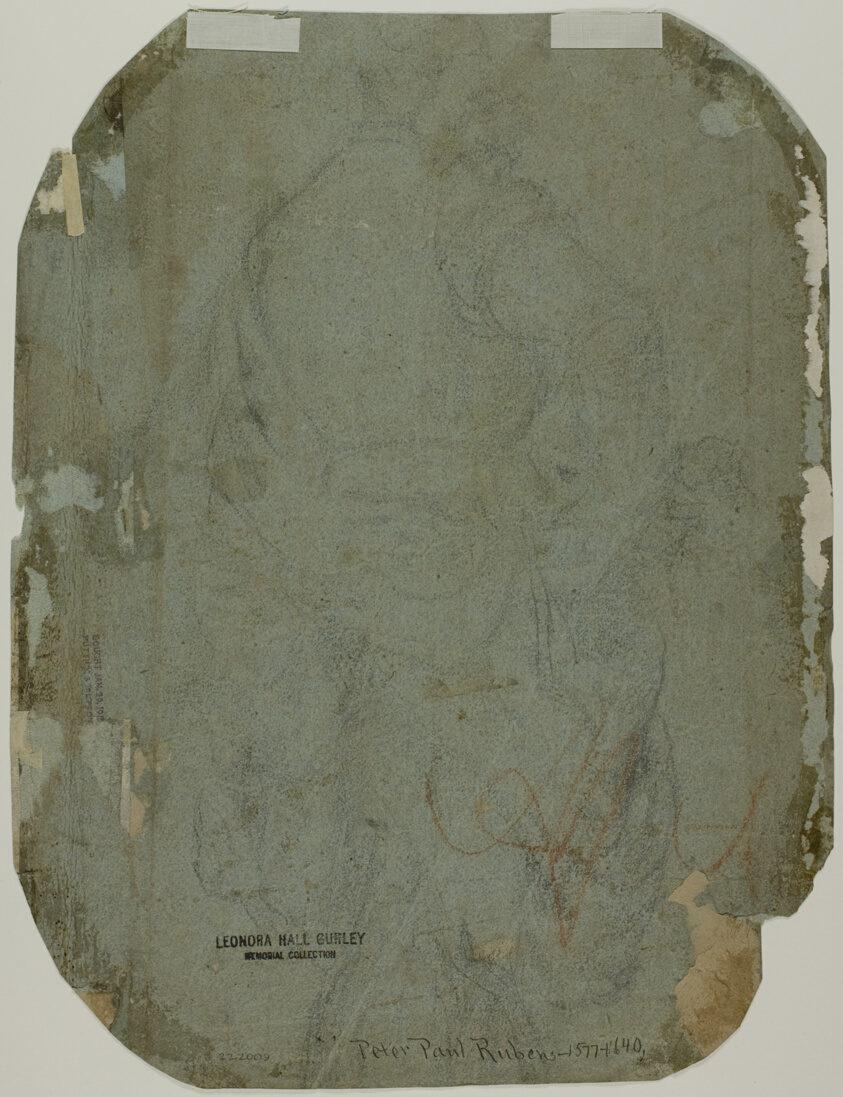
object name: Drawing and Watercolor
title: Conversion of St. Paul (recto); Man Seen from Back (verso)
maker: After Giovanni Antonio da Pordenone; Italian, c. 1483-1539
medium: Pen and brown ink, with brush and brown wash, heightened with lead white (oxidized) (recto), and black chalk and touches of red chalk (verso), on blue laid paper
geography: Italy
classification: ink with wash; drawings (visual works); prints and drawing